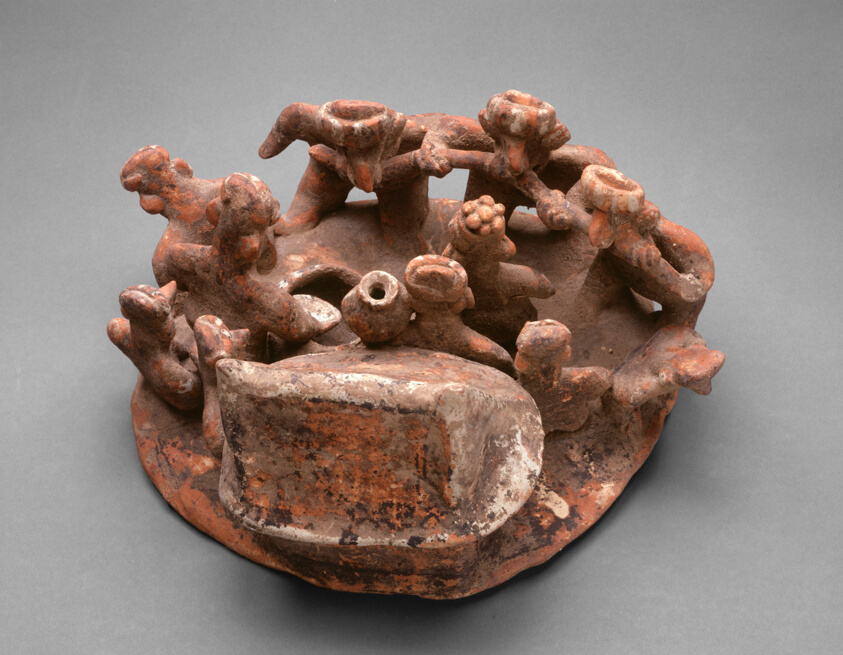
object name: Sculpture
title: Funerary Cheek-Piercing Ritual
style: nayarit, mesoamerican, Pre-Columbian, americas, west mexico, ixtlán del rio, Arts of the Americas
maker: Nayarit (Ixtlán del Río, Nayarit, Mexico)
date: 200 BCE–300 CE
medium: Ceramic and pigment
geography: Nayarit state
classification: earthenware; art of the americas; ceramics; sculpture; funerary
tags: people, communities, funerary art, temple, dancers, ritual, houses